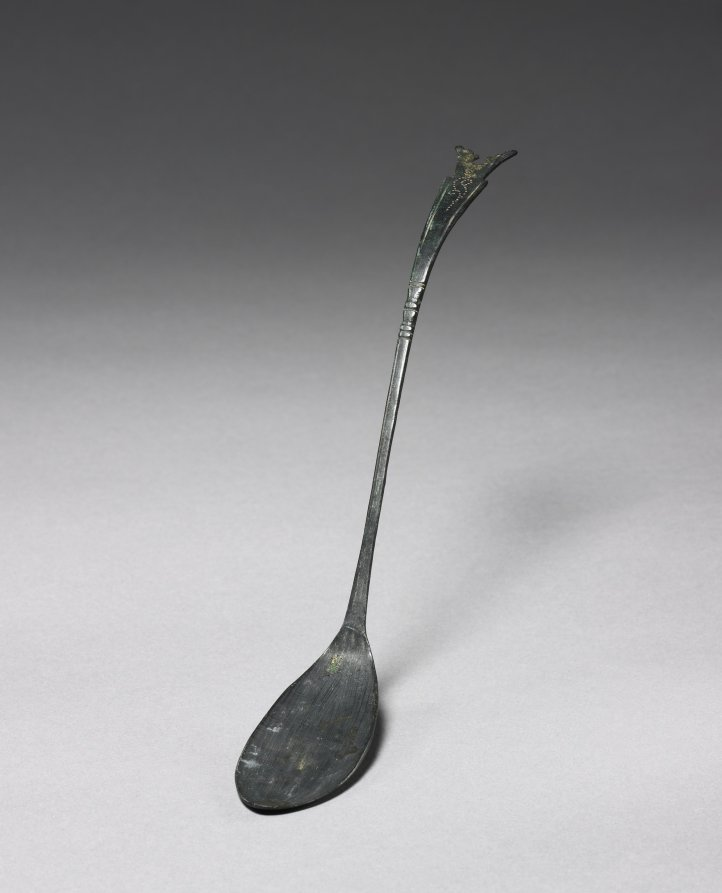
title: Spoons with Fish-Tail Design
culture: Korea, Goryeo dynasty (918–1392)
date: 918–1392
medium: bronze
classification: Metalwork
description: Many of Goryeo period spoons like this one feature a curved handle that splits into a jagged fishtail design. This fishtail design is not unique to Korea; it was also widely used in the area under the rule of two non-Han Chinese states: Liao (907–1125) and Jin (1115–1234). These seemingly ordinary objects testify to exciting material interactions between the Goryeo dynasty and non-Han Chinese northern states, which were often omitted from the official records.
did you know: Bronze spoons are the most common burial item. Scholars have proposed that toward the end of the 14th century, Koreans enjoyed meat-based soups more than any other dishes, explaining why spoons became common household items as well as burial goods.